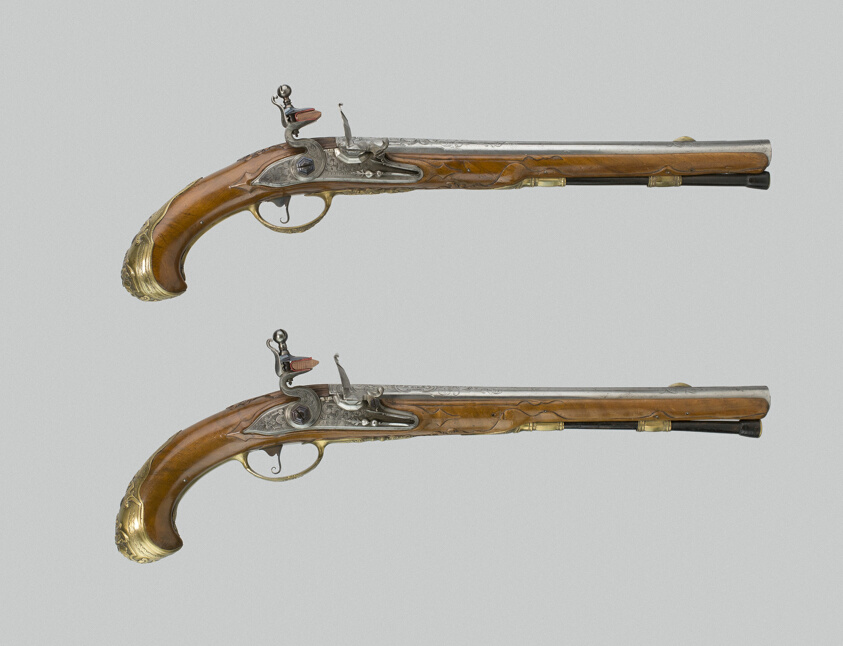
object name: Arms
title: Pair of Flintlock Pistols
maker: Barrels: Johann Jacob Behr; Locks: Johann Jacob Behr; Flemish, Liège, active 1690s-about 1745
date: c. 1725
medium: Walnut, steel, and cast and chased brass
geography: Germany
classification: firearm-handgun; arms; arms and armor